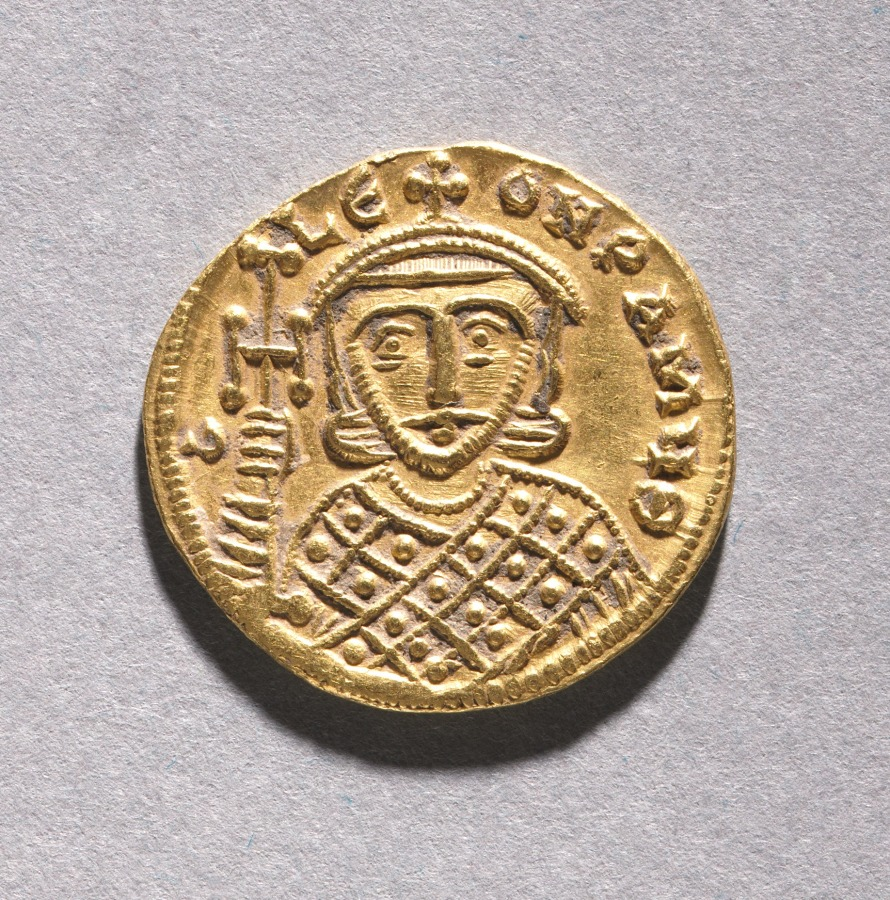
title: Solidus with Leo IV the Khazar and His Father Constantine V Copronymus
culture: Byzantium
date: c. 751–775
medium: gold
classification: Coins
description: The vast number of surviving Byzantine coins attests to the level of trade across the empire. Controlled and supervised by the emperor, the producers of coins took care to represent his authority and reflect his stature. Talented artists were recruited to engrave the dies (molds) used for the striking of coins. Emperors increasingly came to include their heirs and co-emperors on their coinage, as well as other family members or even earlier rulers. Coins were recognized, then as now, as small, portable works of art. With their inscriptions and images, Byzantine coins provide valuable documentation of historical events and a record of the physical appearance of the emperors. The coins shown here include the solidus, the basic gold coin of 24 karats; the tremissis, a gold coin of one-third the weight and value of the solidus; and the nomisma, which in the 10th century replaced the solidus as the standard gold coin.